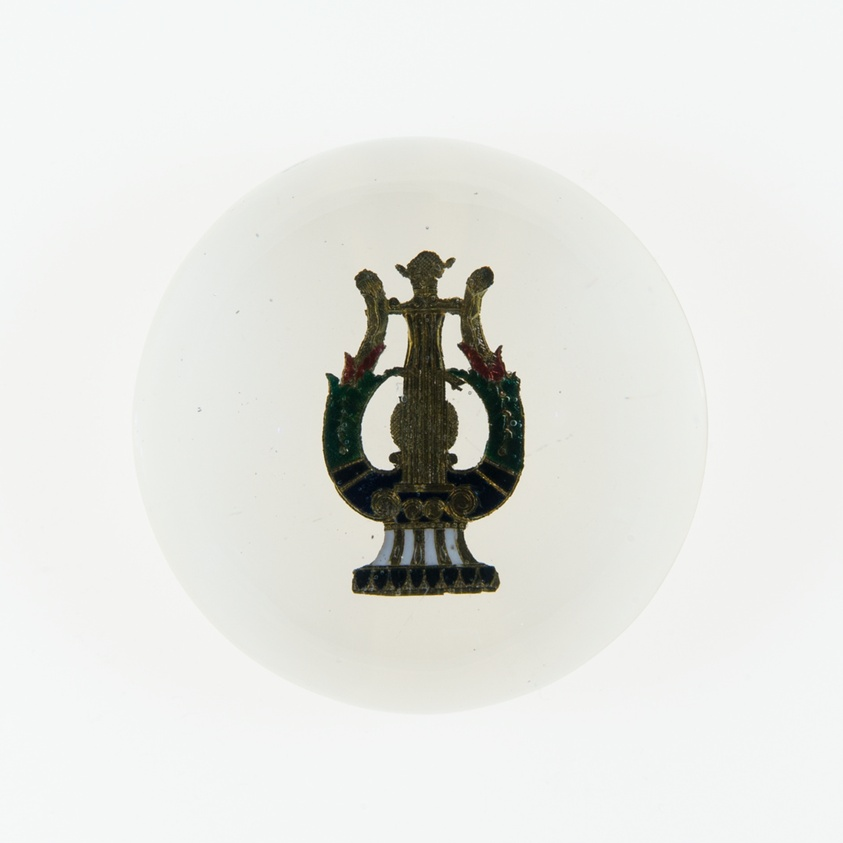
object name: Glass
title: Paperweight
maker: Baccarat Glassworks (Cristalleries de Baccarat); Lorraine, France, founded 1764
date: c. 1846–55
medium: Glass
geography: Lunéville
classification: paperweight; sulphide (glass); european decorative arts; glass